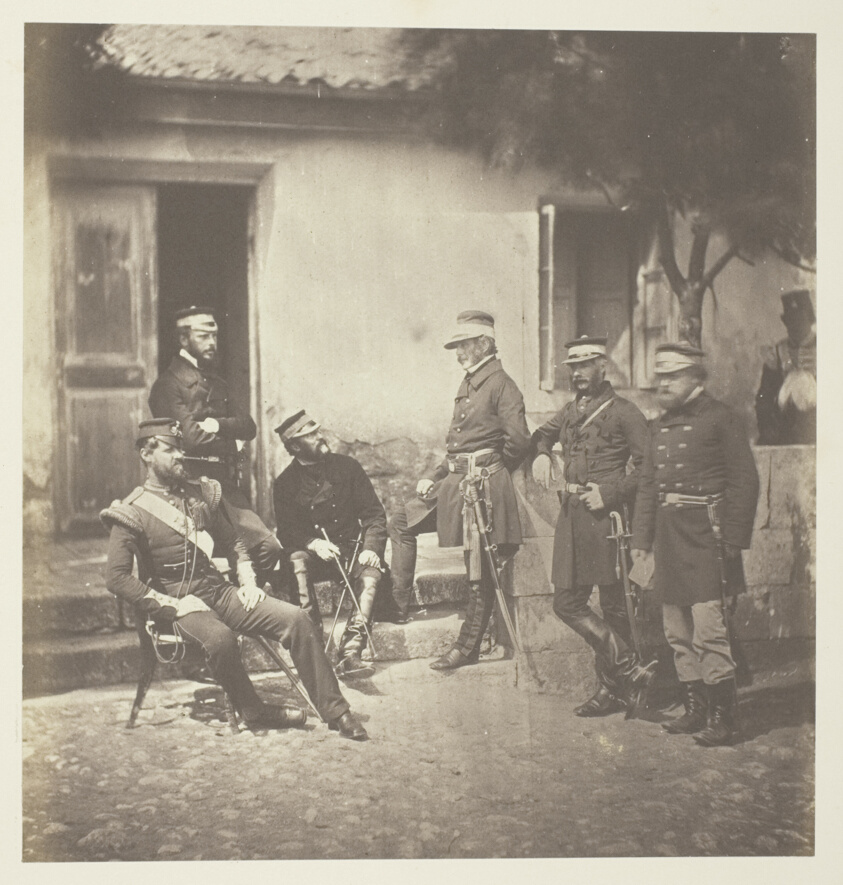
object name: Photograph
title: Major General Estcourt and Staff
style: 19th century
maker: Roger Fenton (English, 1819–1869)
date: 1855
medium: Salted paper print, plate 37 from the album "Photographs Taken in the Crimea" (1856)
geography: England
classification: salted paper print; photographic process; photography; photograph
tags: Collected by Hugh Edwards, Crimea 1856